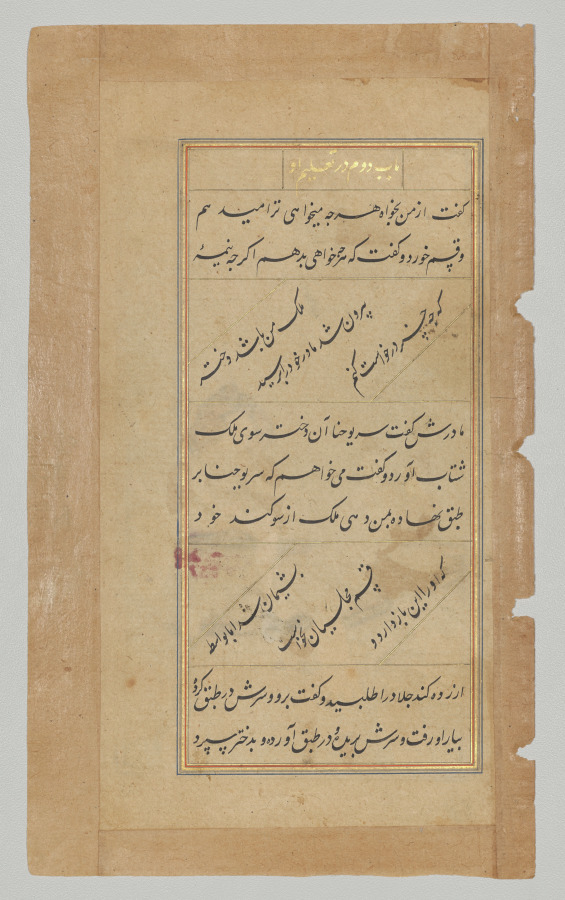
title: Salome Receiving John the Baptist’s Head on a Platter (folio 112 verso), from a Mirror of Holiness (Mir’at al-quds) of Father Jerome Xavier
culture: Mughal India, Allahabad, made for Prince Salim (1569–1627)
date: 1602–4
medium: Gum tempera, ink, color, and gold on paper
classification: Manuscript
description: Herod, King of Judea, sits on a Mughal-style throne as his wife’s daughter Salome reaches for the freshly severed head of John the Baptist. John had offended Herod’s wife, so she took revenge by having her daughter seduce Herod into granting her this wish. Salome is depicted modestly in this painting, and the court musician at the lower left looks on in disgust. The lion head capitals on the pillars above Herod are upside down, seemingly in disapproval of the debauched king.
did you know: Column capitals in Herod’s palace have angels seated on upside-down lion heads.